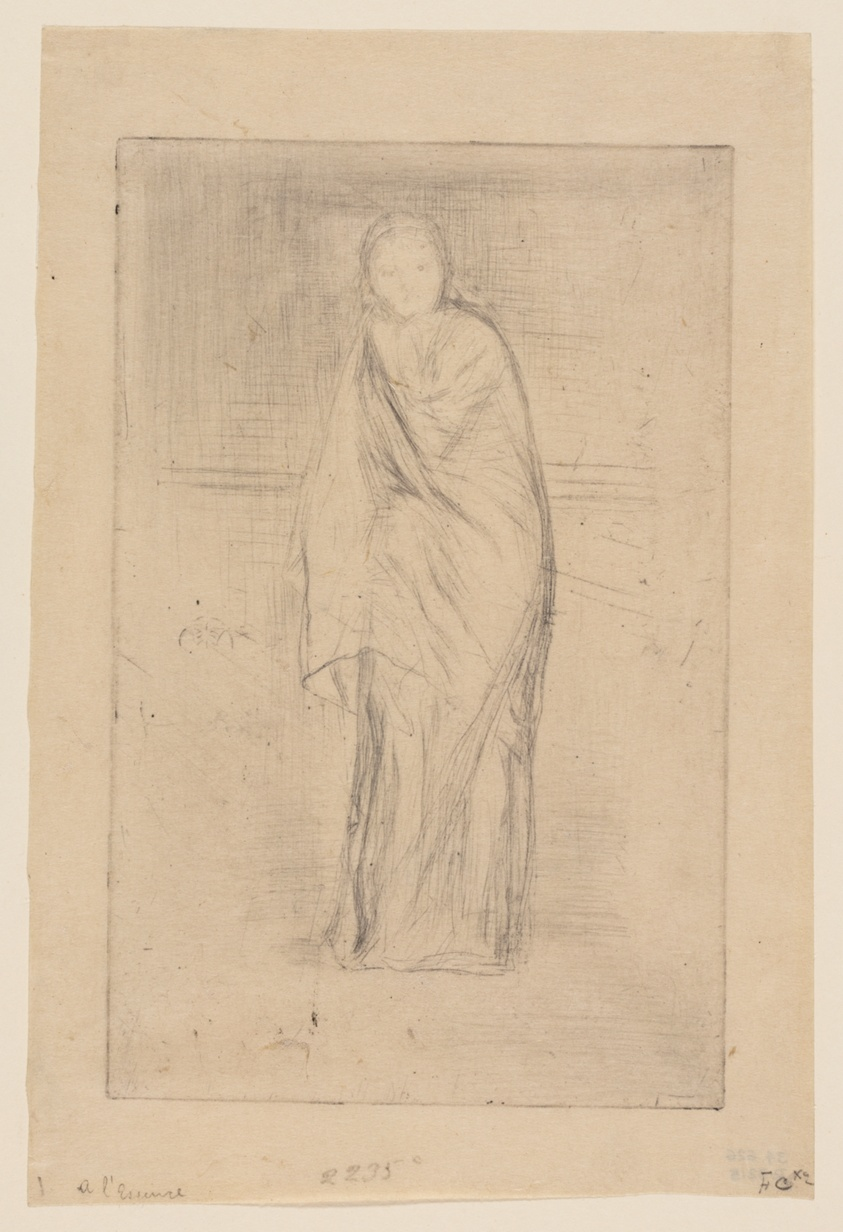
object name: Print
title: Draped Model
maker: James McNeill Whistler (American, 1834-1903)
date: 1873/1874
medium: Drypoint in black ink on cream Japanese paper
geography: United States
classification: drypoint; print; prints and drawing; paper